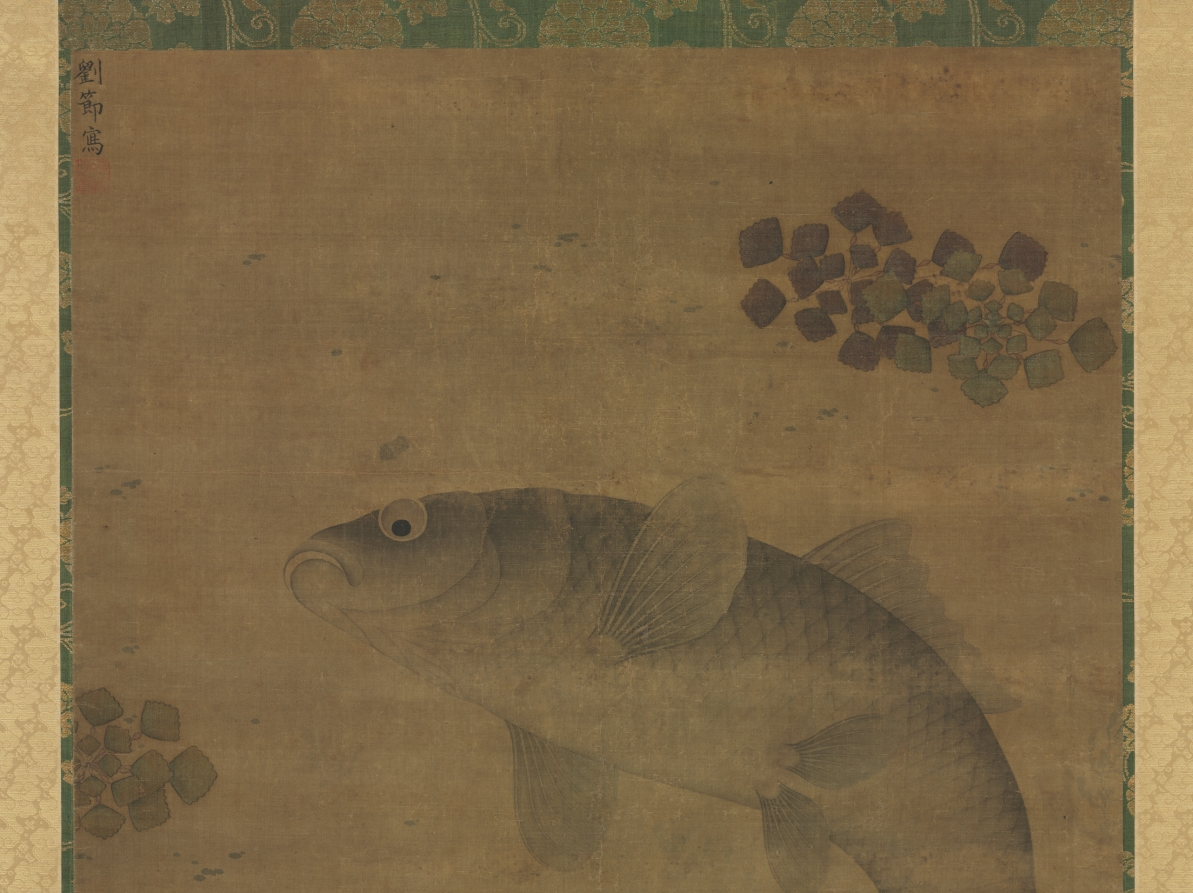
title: Leaping Carp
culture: China, Ming dynasty (1368–1644)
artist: Liu Jie (Chinese, c. 1447–1520s)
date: 1368–1644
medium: hanging scroll, ink and color on silk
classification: Painting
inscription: Artist's signature and seal: Written by Liu Jie 劉節寫. [seal] Chin-i-chih-hui chih chang.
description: With a fine ink line and graded wash, the life-like depiction of these swiftly moving carp is representative of the high quality of works by Liu Jie, a Ming dynasty court painter known for his fish paintings. The artist’s signature and seal are in the painting’s top left corner. The carp is an auspicious and popular subject in Chinese painting. Here, the leaping carp can be associated with “a carp jumping the dragon gate,” which according to mythology transforms into a dragon, emblematic of a scholar’s success in passing the civil service examinations. Another reading suggests that this carp is not leaping but guiding his offspring in worshipping heaven.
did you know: The clusters of geometric leaves painted with mineral pigments are likely water caltrap.